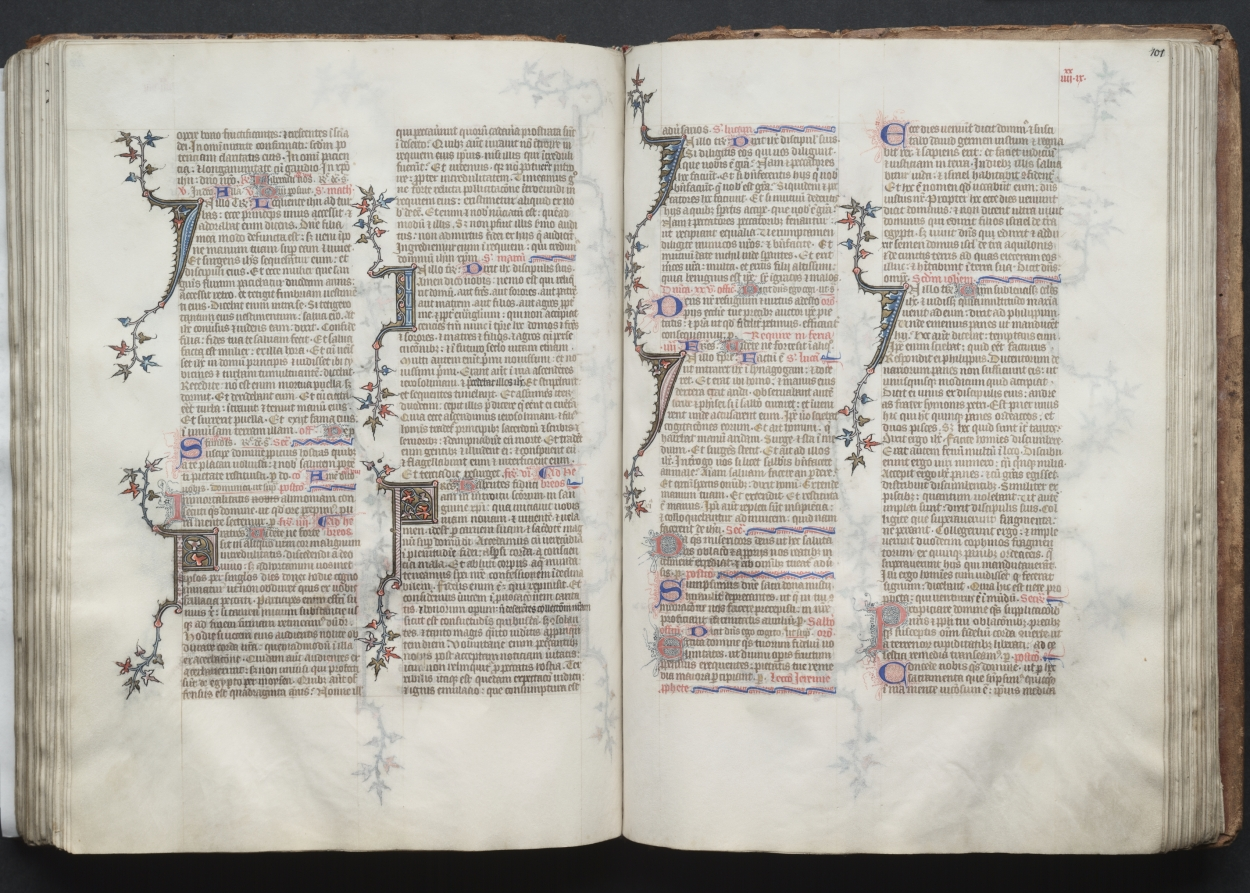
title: The Gotha Missal: Fol. 100v, Text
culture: France, Paris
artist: Master of the Boqueteaux (French)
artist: and Workshop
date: c. 1375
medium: ink, tempera, and gold on vellum; blind-tooled leather binding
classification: Bound Volume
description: The style and quality of this manuscript's decoration is typical of deluxe Parisian books made for aristocratic or royal patrons. Most of the book's decoration appears to be the work of the Master of the Boqueteaux, an artist active at the court of King Charles V (died 1380). His style was apparently shared by a number of book illuminators working in and around Paris. It is very possible that the Gotha Missal belonged to Charles V, but is not provable because the manuscript has no royal portraits and lacks a colophon. Given the book's magnificent decoration, however, it would seem that it was produced for a Valois prince, if not for the king himself. The manuscript receives its name from the German dukes of Gotha, its later owners.